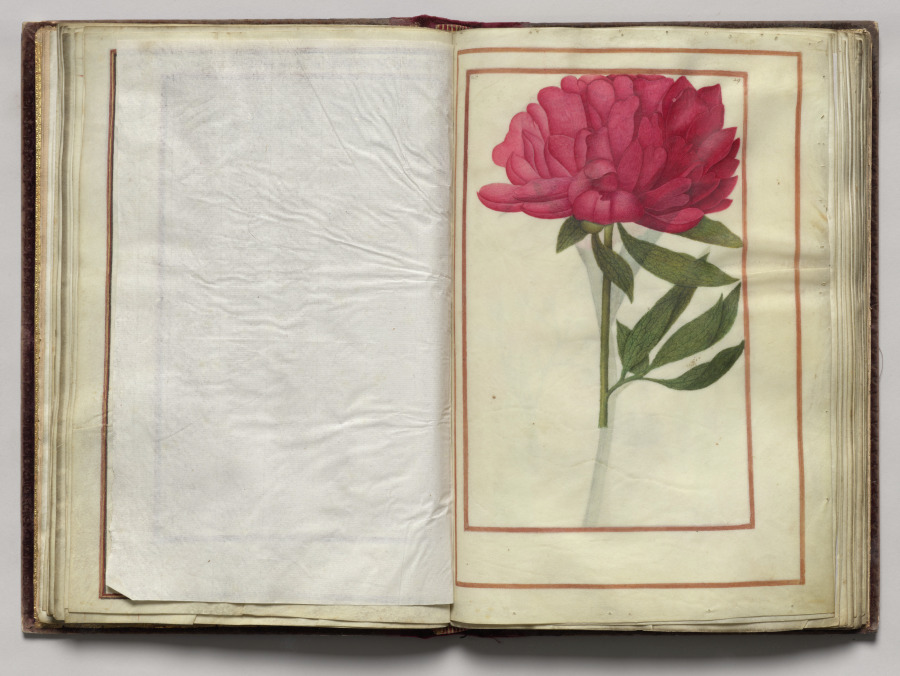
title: Red Peony, folio 17 (recto), from Florilegium (A Book of Flower Studies)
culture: France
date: 1608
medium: watercolor, ink, silver, and gold over occasional traces of pencil, on vellum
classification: Bound Volume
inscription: Dated: Poitiers 1608 (on frontispiece) Signed: On frontispiece in black ink, lower right: Van Kuyk Notation on drawing: Frontispiece: in pencil, lower margin: * élève de Van Kessel, peintre flammand (* in pencil also appears in front of Van Kuyk's name).